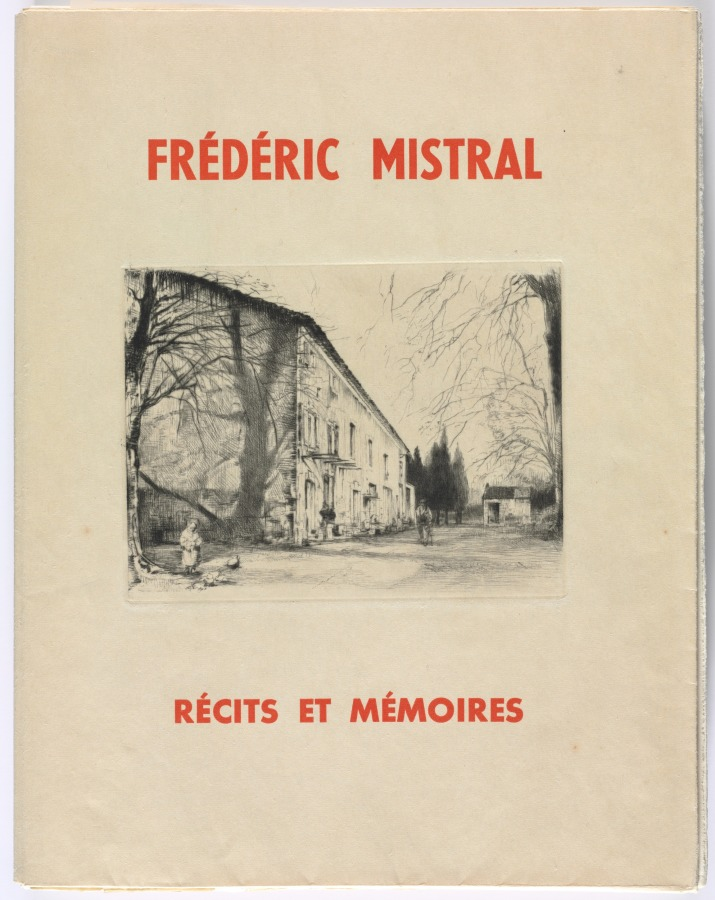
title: Frédéric Mistral: Mémoires et Recits by Frédéric Mistral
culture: France, 20th century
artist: Auguste Brouet (French, 1872–1941)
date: 1937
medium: etchings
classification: Portfolio